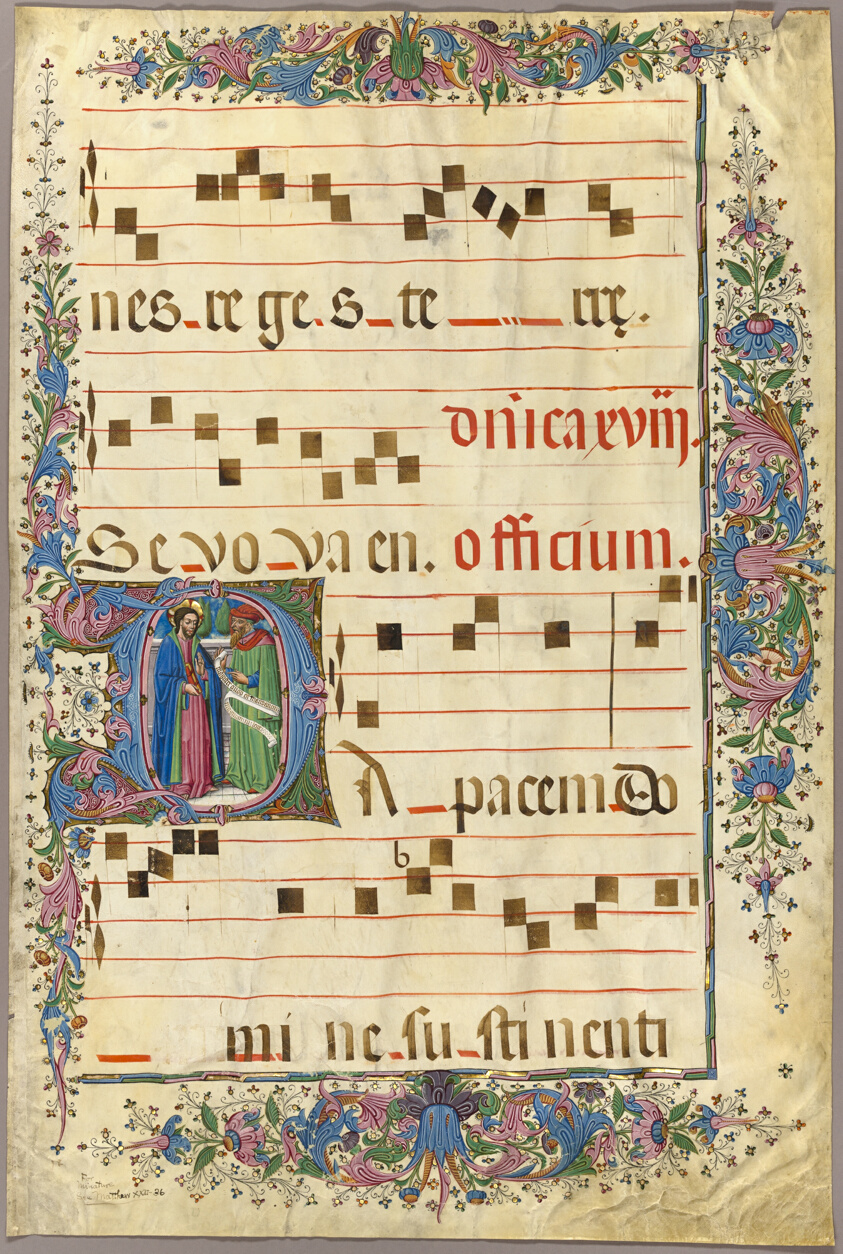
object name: Drawing and Watercolor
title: Page from a Choirbook with Christ and a Pharisee in a Historiated Initial “D”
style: medieval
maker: Spanish (Seville); Master of the Cypresses (Pedro da Toledo or Nicolás Gómez) (Spanish, flourished c. 1420-1440 or 1460-1490)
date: 1430/90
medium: Manuscript cutting in tempera and gold leaf, with rounded gothica textualis inscriptions in brownish black ink, ruled in red, on parchment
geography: Spain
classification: drawings (visual works); manuscript; prints and drawing